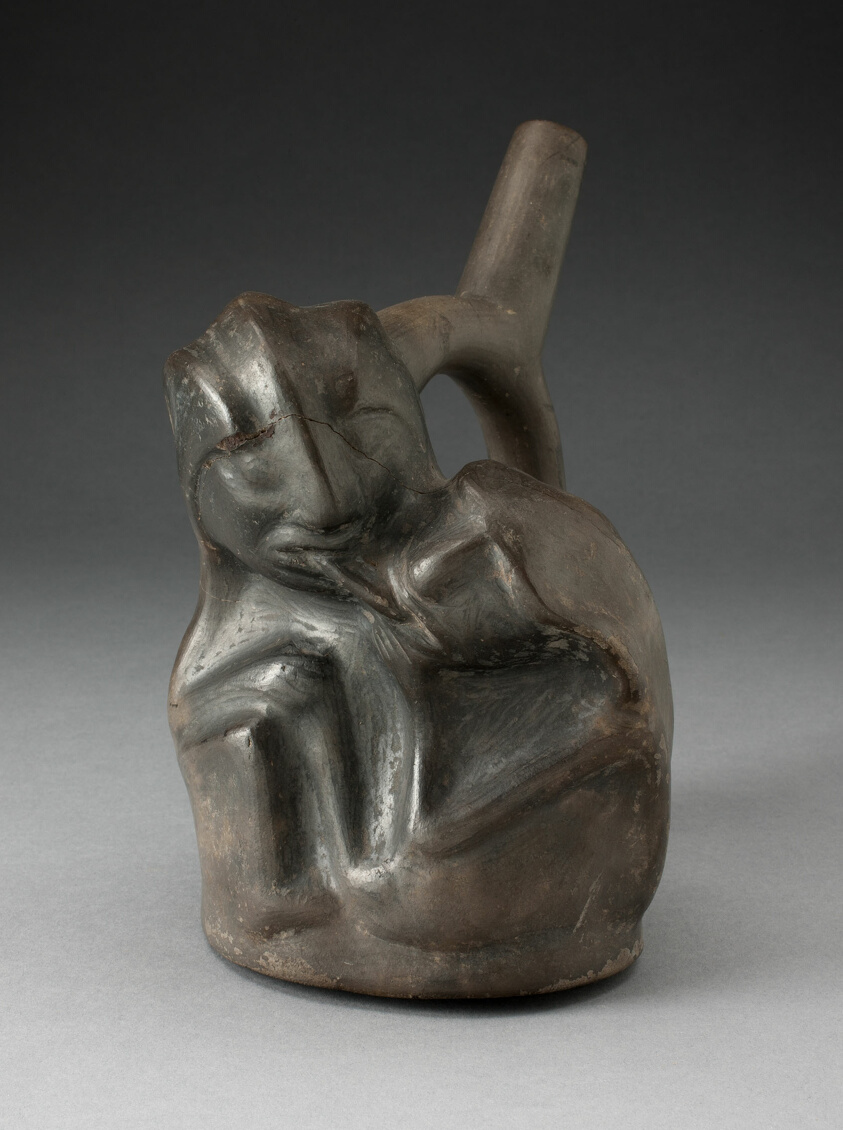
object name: Vessel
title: Blackware Spouted Vessel in the Form of a Couple in an Erotic Embrace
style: moche, mochica v, mochica, early intermediate period, Pre-Columbian, americas, Arts of the Americas, andean, andes, south american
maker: Moche (North coast, Peru)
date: 100 BCE–500 CE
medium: Ceramic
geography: Peruvian North Coast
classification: blackware (black basaltes); art of the americas; earthenware; ceramics; vessel